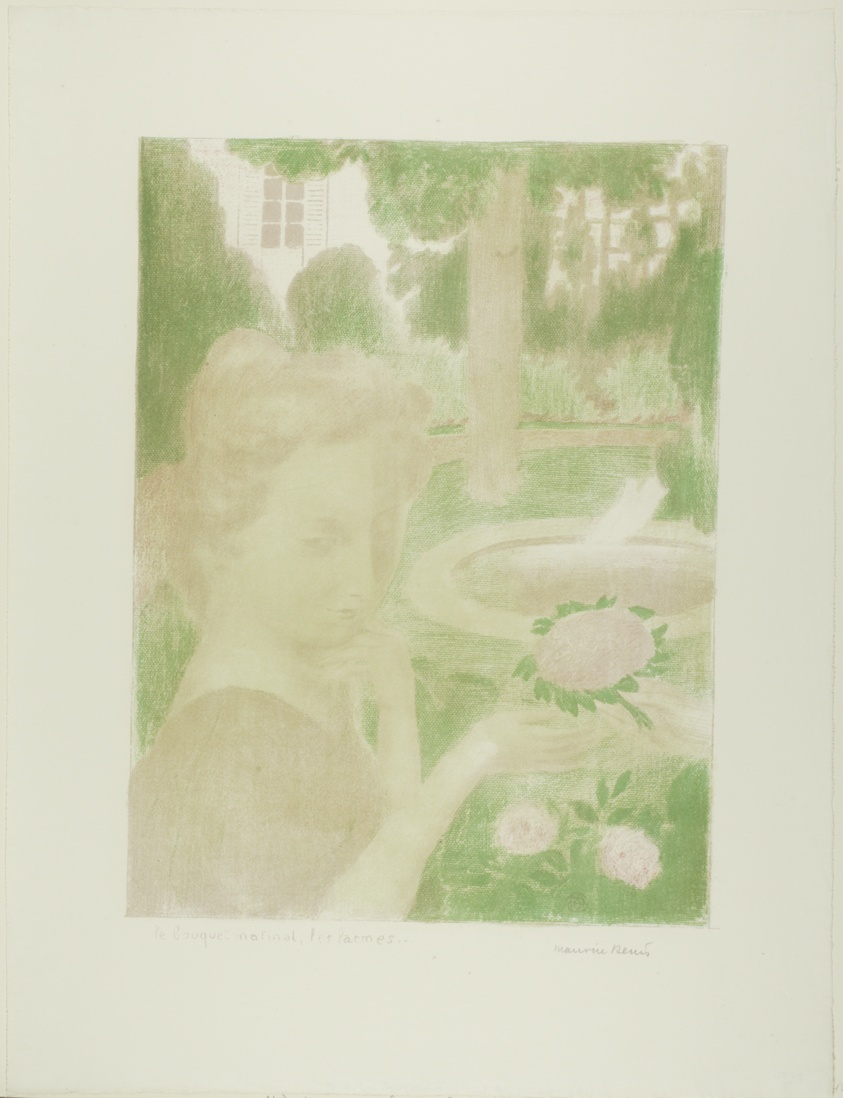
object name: Print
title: The Morning Bouquet, Tears, plate three from Love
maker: Maurice Denis (French, 1870-1943); published by Ambroise Vollard (French, 1867-1939)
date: 1898, published 1899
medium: Lithograph in pale pink, green, and pale green on light ivory wove paper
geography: France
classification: lithograph; print; prints and drawing